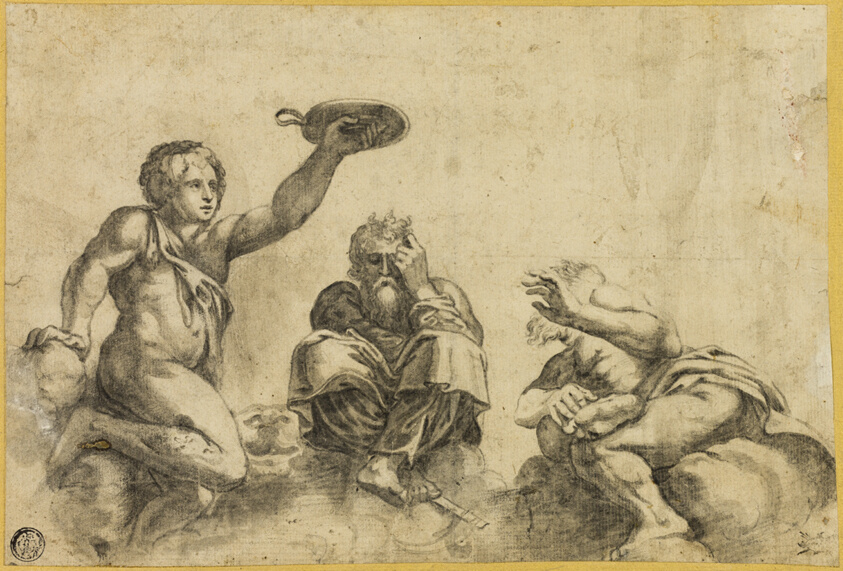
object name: Drawing and Watercolor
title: Time Seated on Clouds, Flanked by Two Other Angels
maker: Giulio Pippi, called Giulio Romano, after; Italian, c. 1499-1546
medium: Black chalk, with brush and black chalk wash and stumping, on cream laid paper, laid down on cream laid paper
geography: Italy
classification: chalk with wash; drawings (visual works); prints and drawing